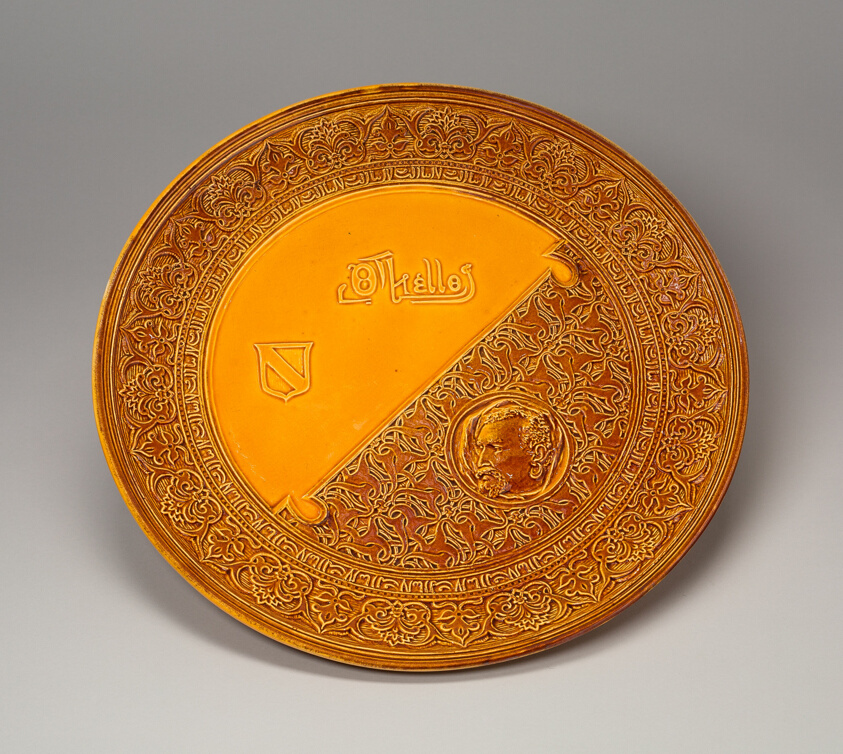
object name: Ceramics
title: Othello Plaque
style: Arts and Crafts Movement, American Arts and Crafts Movement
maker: Designed and modeled by J.C. Meyenberg (American, late 19th–early 20th century); Rookwood Pottery (American, 1880–1967); Sold by Duhme & Co. (American, 1843-1893); Cincinatti, Ohio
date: 1884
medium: Earthenware and glaze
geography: Cincinnati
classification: plaque (flat object); earthenware; pottery; ceramics; american decorative arts; american arts; decorative arts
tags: theater, Óthello, shakespeare